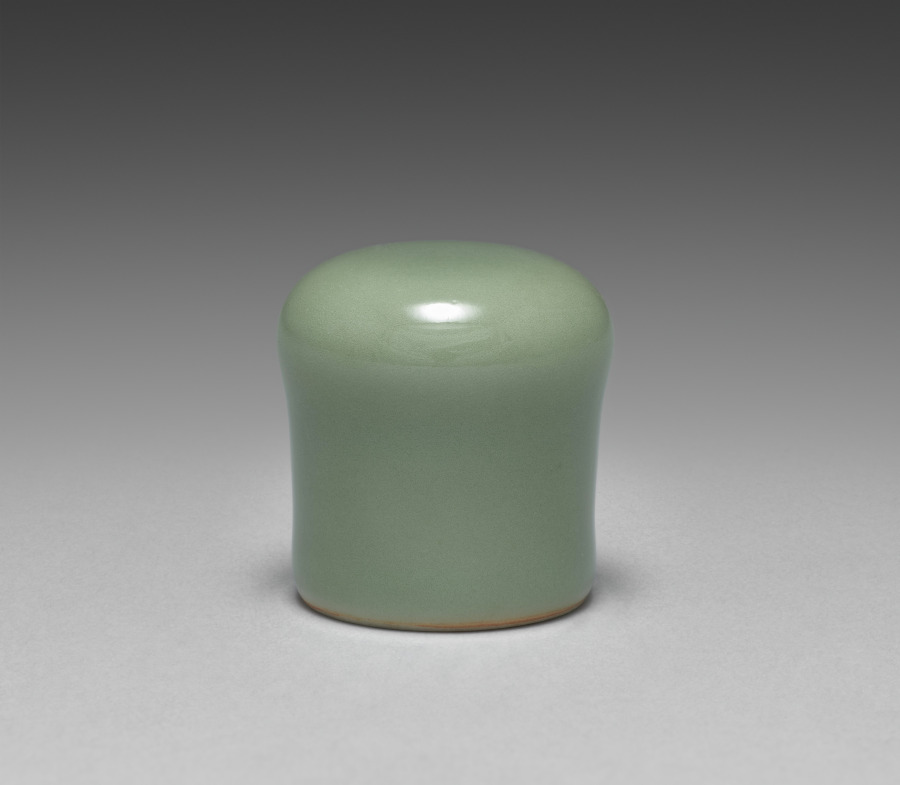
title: Roller End for Hanging Scroll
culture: Japan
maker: Seifū Yohei III (Japanese, 1851–1914)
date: 1893–1914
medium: One of a pair of hanging scroll roller ends; porcelain with celadon glaze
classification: Ceramic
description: Before entering into his apprenticeship with Yohei II, Seifū Yohei III trained as a painter in Osaka. He continued to paint throughout his career as a ceramist. As part of his ceramic practice, Yohei III also made roller ends to be placed at either end of the wooden dowel around which the lower part of a hanging scroll mounting is wrapped. These served both as weights for the painting and as knobs for handling it when rolling and unrolling. The pair here is made of porcelain with a green glaze.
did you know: This is one of two roller ends for the hanging scroll by Seifū Yohei III, Rain Clearing over a Summer’s Mountain, CMA 2022.151.